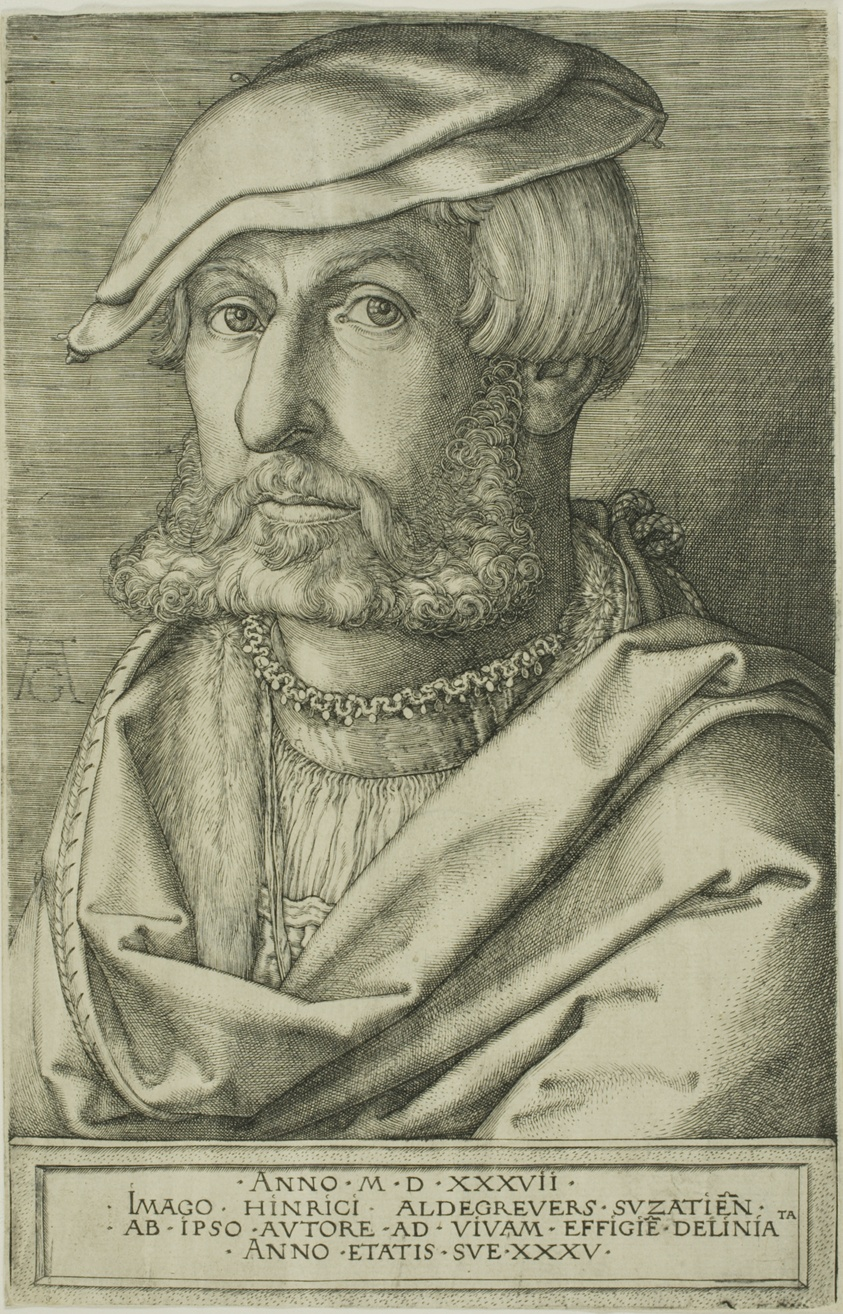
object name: Print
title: Heinrich Aldegrever, Aged 35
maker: Heinrich Aldegrever (German, 1502-c.1560)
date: 1537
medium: Engraving in black on ivory laid paper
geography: Germany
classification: engraving; print; prints and drawing